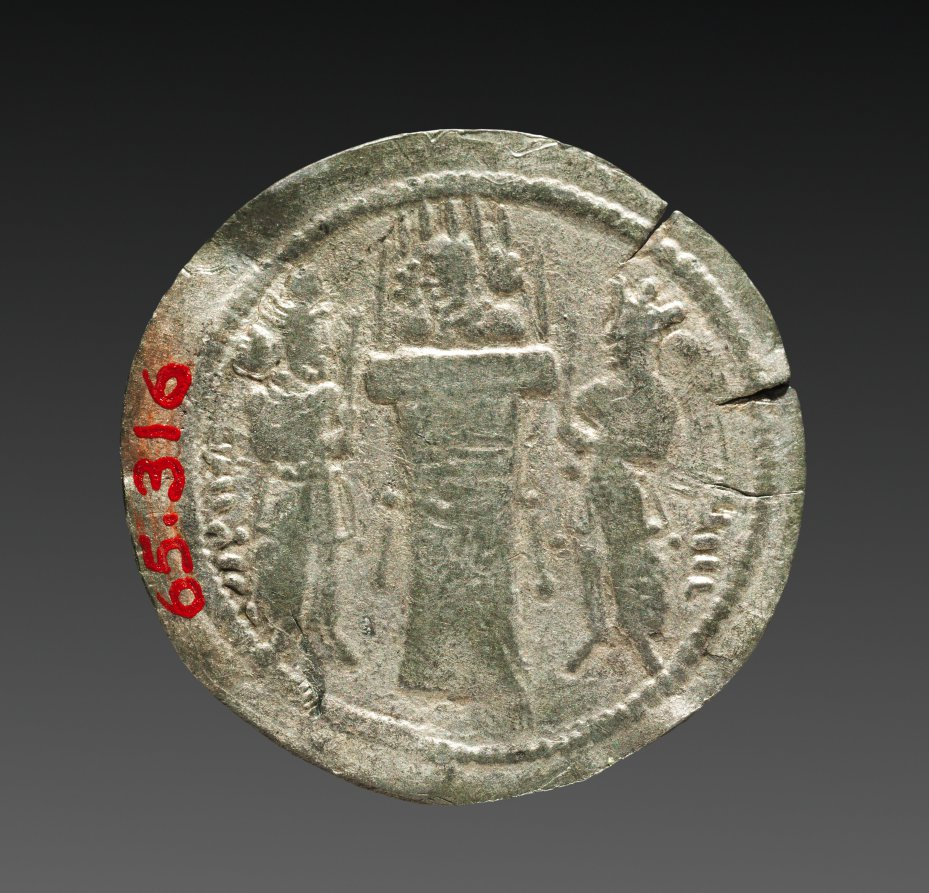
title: Drachm: Fire altar with bust, Zoroastrian priest holding sword left, King as priest holding sword right (reverse)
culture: Iran, Sasanian Empire (224–651 CE), reign of Hormizd II (303–309)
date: 302–309 CE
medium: silver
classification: Coins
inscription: 𐭠𐭲𐭥𐭫𐭦𐭩𐭠𐭥𐭧𐭬𐭦𐭣